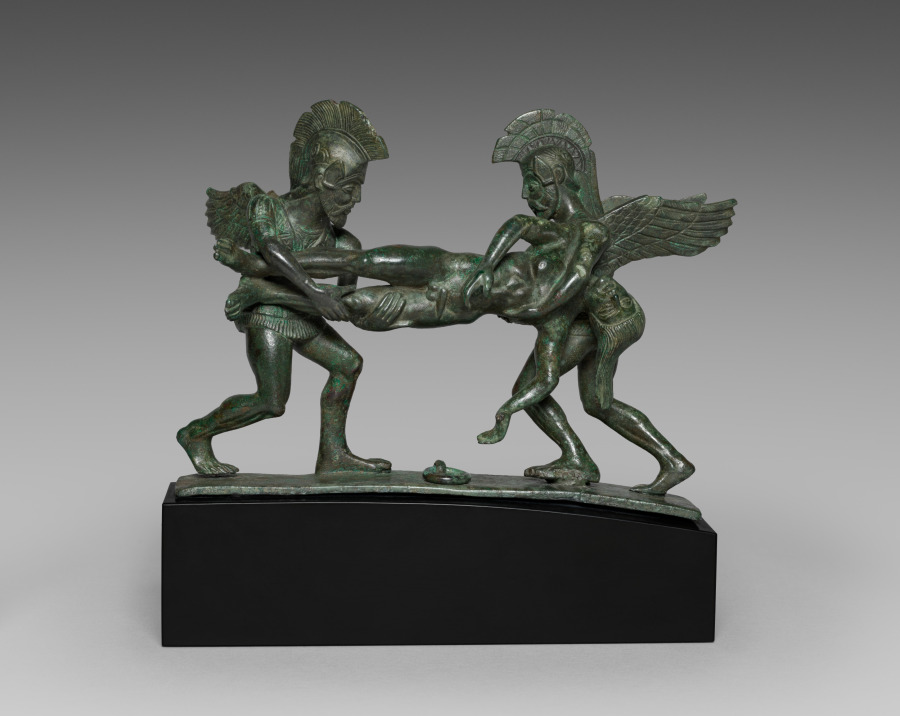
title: Sleep and Death Cista Handle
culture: Etruscan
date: 400–375 BCE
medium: bronze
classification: Sculpture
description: Designed for attachment to the lid of a large bronze cista, a cylindrical lidded box, these three figures probably represent Sleep (Hypnos) and Death (Thanatos) holding the body of Sarpedon. A son of Zeus who helped to defend Troy from invading Greek forces, "godlike Sarpedon of the brazen helmet" fell at the hands of Patroclus, as told by Homer in Book XVI of the Iliad. Apollo then intervened to protect the body, removing it from danger and entrusting it to the two winged deities, as depicted here and in a number of other ancient artworks, Greek and Etruscan alike. If not Sarpedon, the fallen warrior could be Memnon, the son of Eos and Tithonos slain by Achilles.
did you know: These three figures were cast in eight separate pieces, then welded together and attached to the rectangular base.